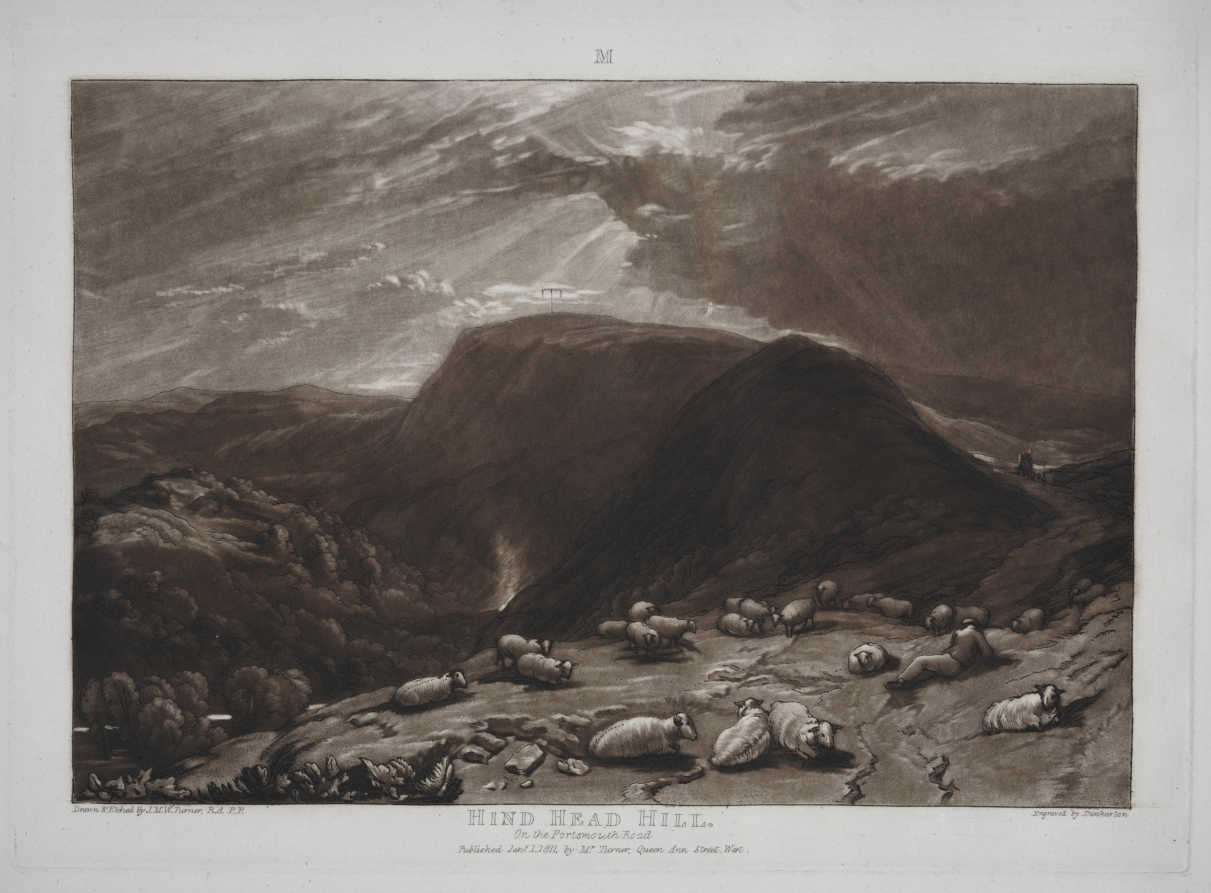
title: Liber Studiorum: Hind Head Hill on the Portsmouth Road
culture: England, 19th century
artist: Joseph Mallord William Turner (British, 1775–1851)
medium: etching and mezzotint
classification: Print